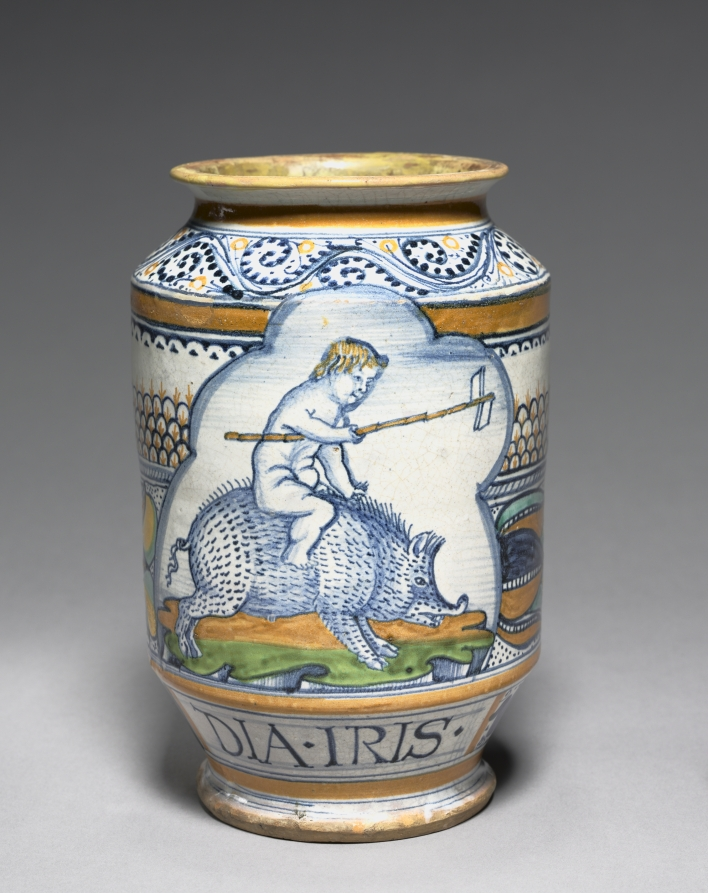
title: Pharmacy Jar (Albarello)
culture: Italy, Siena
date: c. 1510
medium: tin-glazed earthenware (maiolica)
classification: Ceramic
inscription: located above foot of jar: DIA-IRIS.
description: Storage jars that lined the shelves of Renaissance pharmacies often held medicinal herbs, spices, and ointments. Their shape made them easy to grasp while the flared lip allowed apothecaries to seal off the contents with parchment or cloth secured by a string. This particular storage jar depicts a child riding a wild boar.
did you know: The scroll along the bottom reads DIA IRIS, indicating that it may have once held a medicinal iris compound.